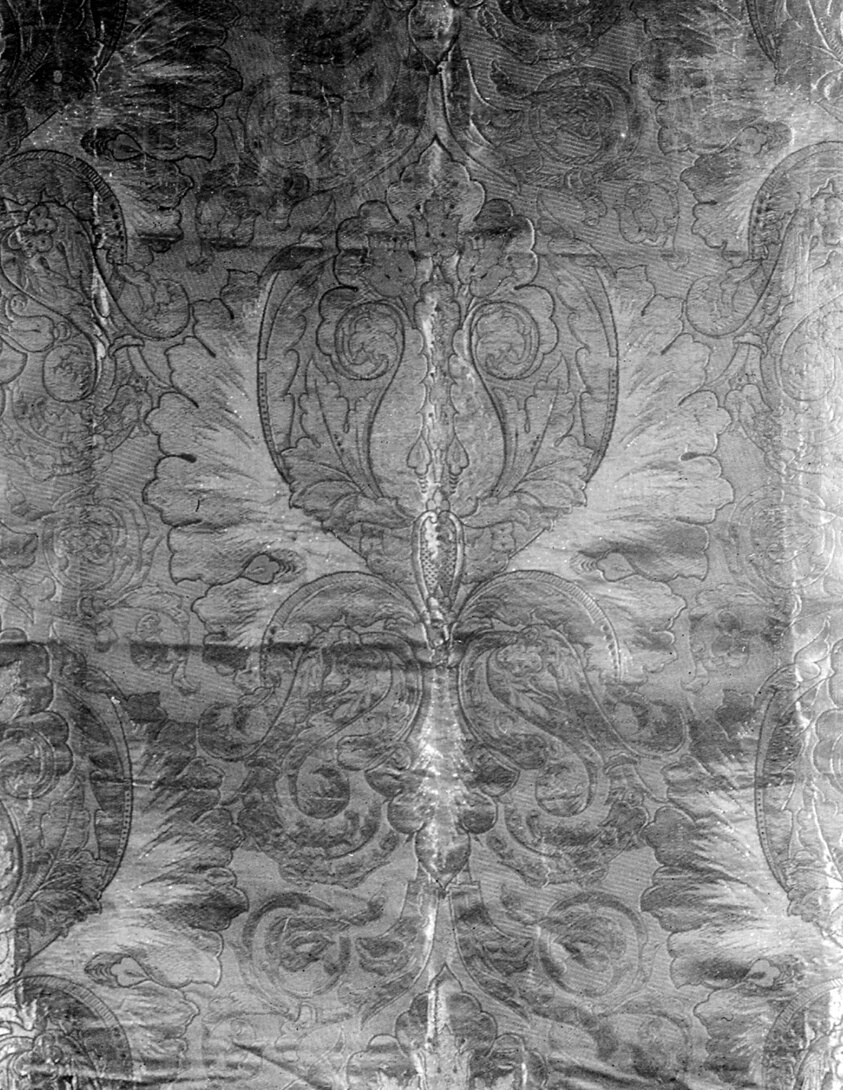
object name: Textile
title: Panel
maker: Russia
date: 1875/1900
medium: Brocaded plain compound cloth (research card)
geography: Russia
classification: textile; weaving